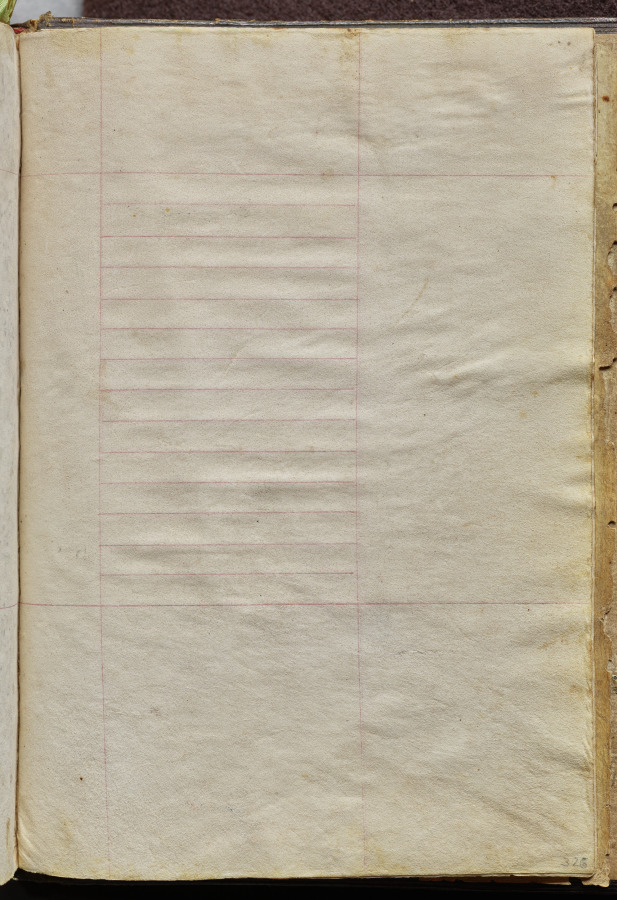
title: Hours of Charles the Noble, King of Navarre (1361-1425), fol. 326r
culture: France, Paris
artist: Master of the Brussels Initials and Associates (French)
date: c. 1405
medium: ink, tempera, and gold on vellum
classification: Bound Volume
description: This precious volume was obviously highly prized by its owner, the French-born King of Navarre, who had his coat of arms painted on no less than twenty folios. Rather than directly commissioning this manuscript from a specific workshop, it seems that Charles the Noble acquired his book of hours -- perhaps ready-made for the luxury market -- while on a trip to Paris in 1404-05. A collaborative effort, six painting styles are evidenced within the pages of this codex, those of two Italians, two Frenchmen, and two Netherlanders. The painter who was responsible for the planning and decoration of the book, and who produced seventeen of the large miniatures, was a Bolognese artist known as the Master of the Brussels Initials. His principal assistant, responsible for most of the borders, was a Florentine who signed his name "Zecho" da Firenze on folio 208 verso.